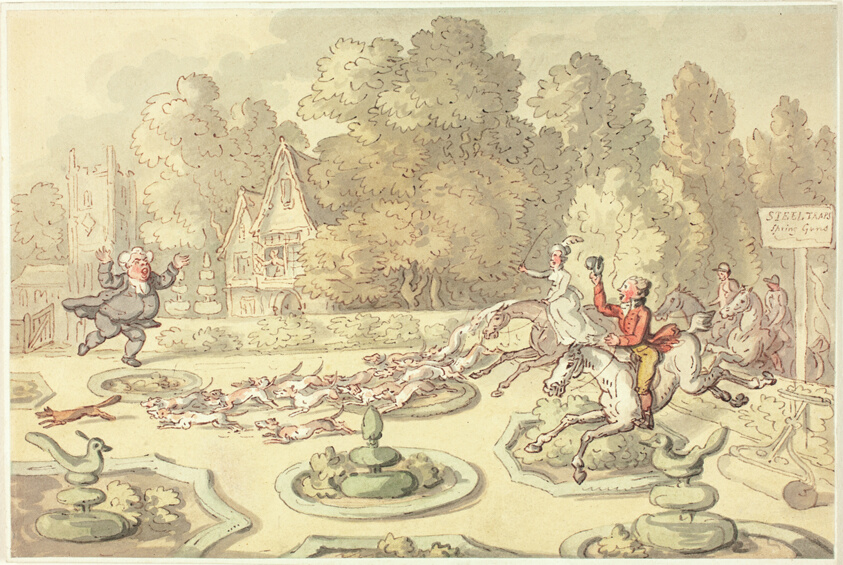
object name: Drawing and Watercolor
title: Enraged Vicar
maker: Unknown artist; possibly after Thomas Rowlandson (English, 1756-1827) or his circle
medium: Watercolor and pen and brown ink, on cream wove paper, laid down on ivory laid paper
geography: England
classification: watercolor; drawings (visual works); prints and drawing